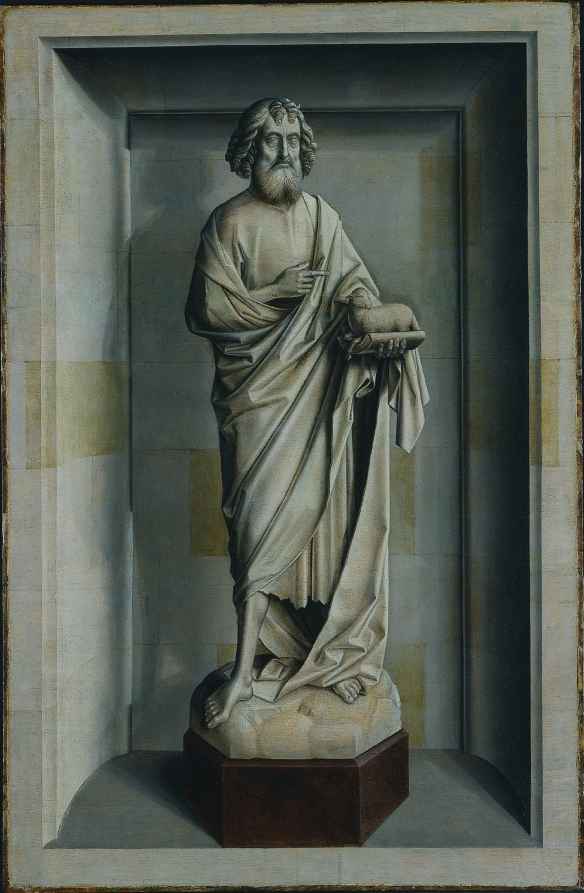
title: Saint John the Baptist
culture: Netherlands, Leuven, 15th century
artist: circle of Dieric Bouts (Netherlandish, 1415–1475)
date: c. 1475–85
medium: oil on wood (grisaille)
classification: Painting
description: This panel once formed part of an altarpiece painted for the Church of Saint Laurentius in Cologne. It originally comprised the reverse of the arrest of Christ, now in the Alte Pinakothek in Munich. Another grisaille panel representing Saint John the Evangelist, also in Munich, formed the exterior of the resurrection. The grisaille technique was a monochromatic method utilizing various shades of gray, often in imitation of sculpture, as is the case here. The illusionistic effect suggests a sculpture not set back in a niche, but clearly separated from it to enhance the three-dimensional appearance. Dieric Bouts was born in Haarlem in Holland, but was mainly active in Leuven in the South Netherlands where he was the city painter from 1468. This painting appears to be the work of a close follower.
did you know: Paintings like this one that are designed to trick the eye are known as trompe-l'œil.